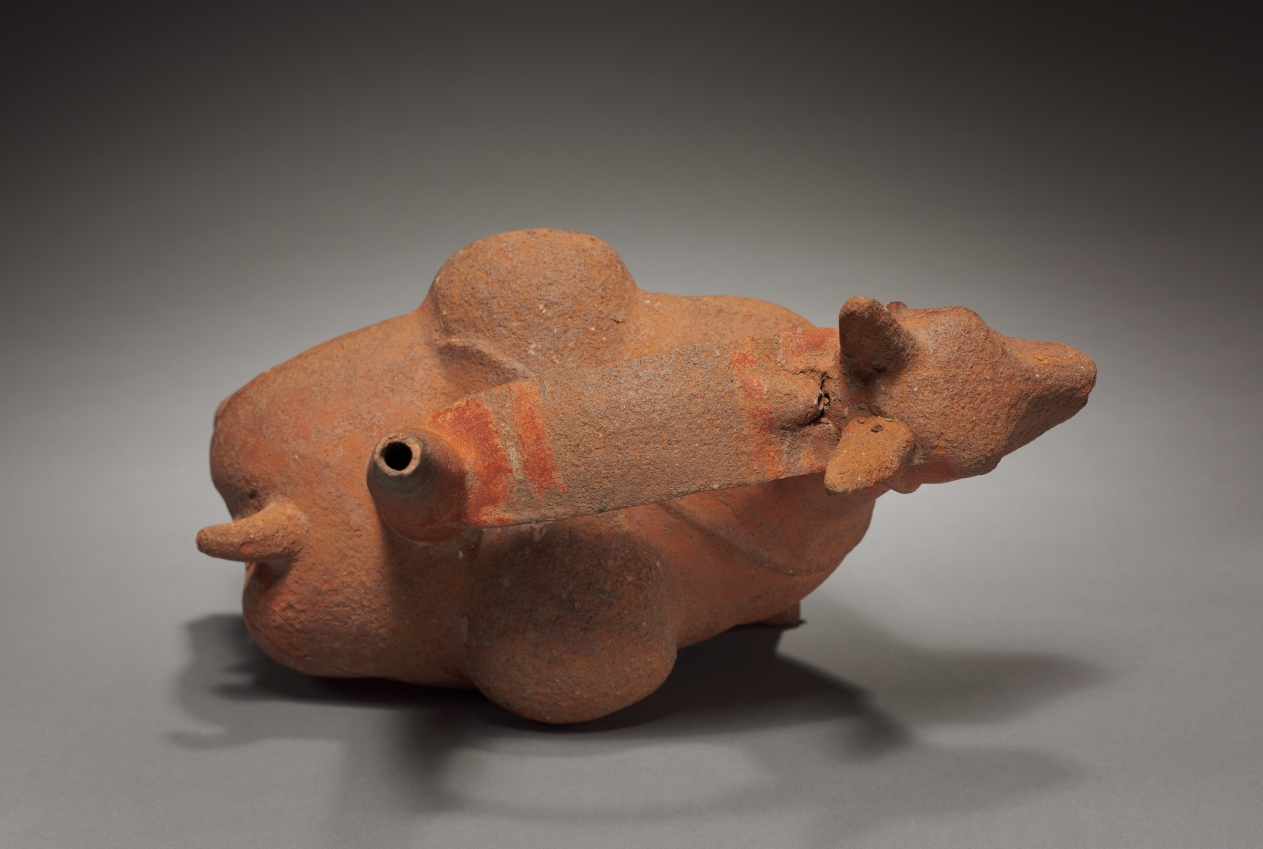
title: Llama with Packs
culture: Peru, Chimú or Inca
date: before 1532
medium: pottery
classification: Ceramic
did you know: The llama was the only burden-bearing animal, aside from humans, in ancient South America.